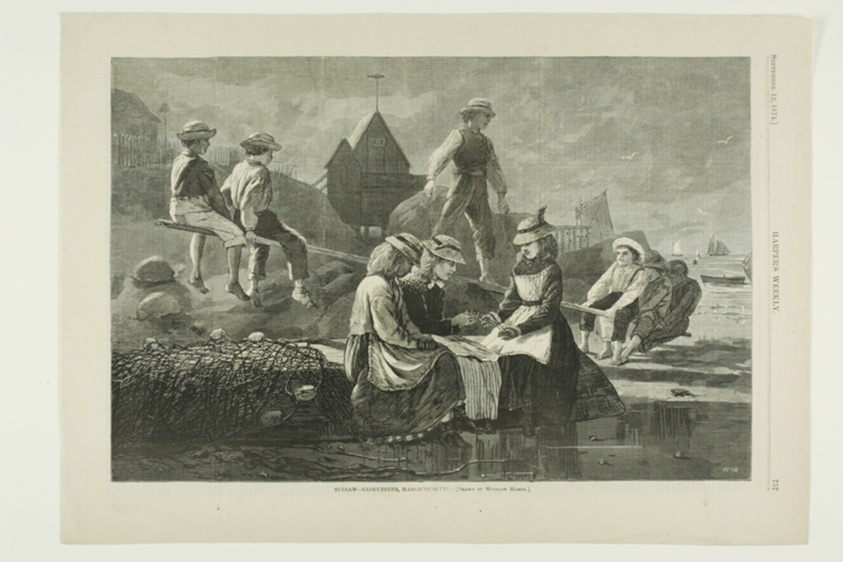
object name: Print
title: Seesaw—Gloucester, Massachusetts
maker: Winslow Homer (American, 1836-1910); published by Harper's Weekly (American, 1857-1916)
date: published September 12, 1874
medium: Wood engraving on buff wove paper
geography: United States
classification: wood engraving; print; prints and drawing